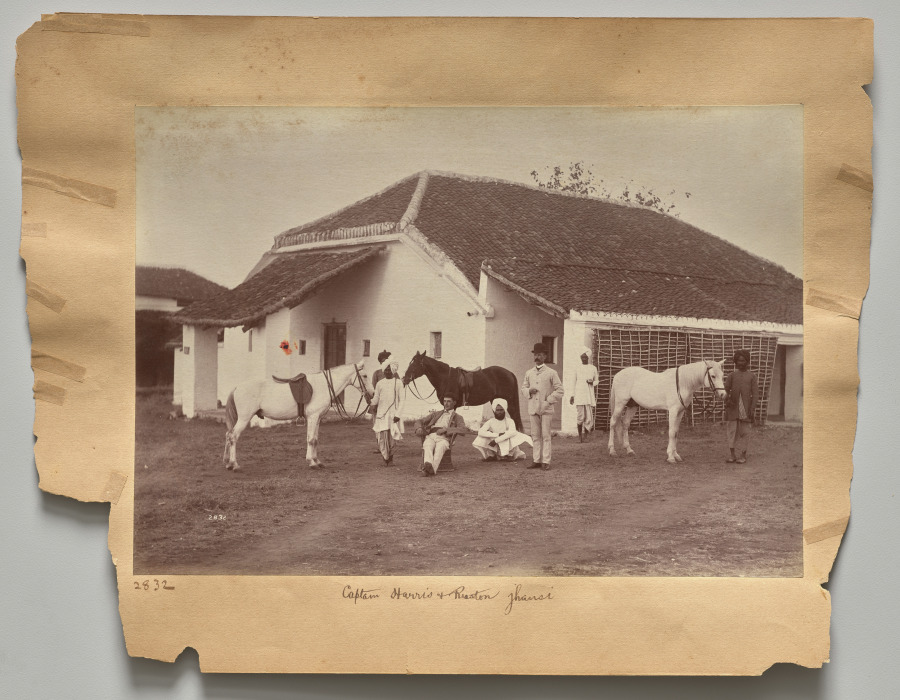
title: Captain Harris and Ruston, Jhansi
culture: India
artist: Raja Deen Dayal (Indian, 1844–1905)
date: c. 1882–87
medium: albumen print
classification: Photograph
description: These photographs are part of an album, now disassembled, of around 105 photographs taken in India between 1885 and summer 1887 that provide glimpses into the lives of the British colonial elite and royal and upper-class Indians. The museum holds another group of 37 pictures from this album (2016.266), which was probably commissioned by a British civil servant visiting or working in India around 1888 as a personal souvenir of his experiences there.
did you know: Raja Deen Dayal is regarded now, and was considered during his lifetime, to be India’s most important 19th-century photographer.